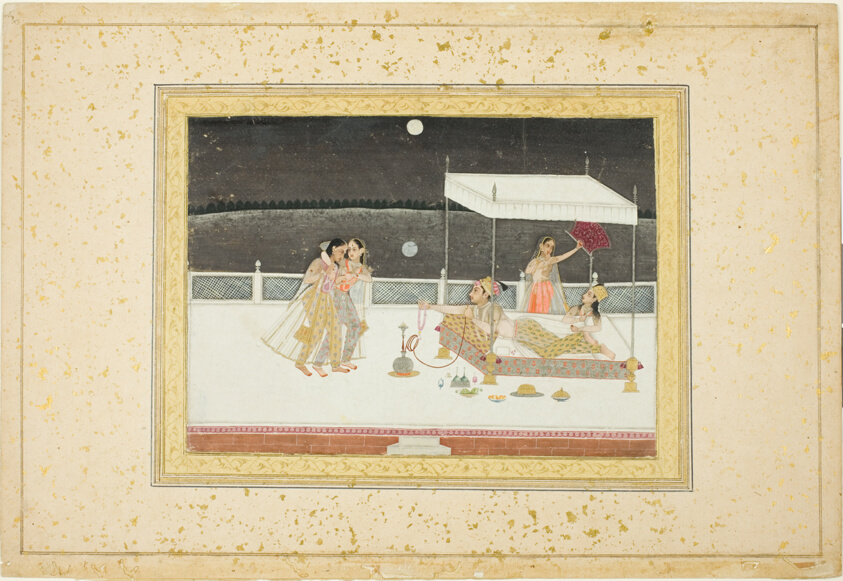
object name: Painting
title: Seduction Scene on a Terrace by Moonlight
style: South Asian, mughal, Indian (South Asian), asian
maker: India; Possibly West Bengal, Murshidabad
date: 18th century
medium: Opaque watercolor with gold on paper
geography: Murshidabad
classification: miniature painting; painting; asian art